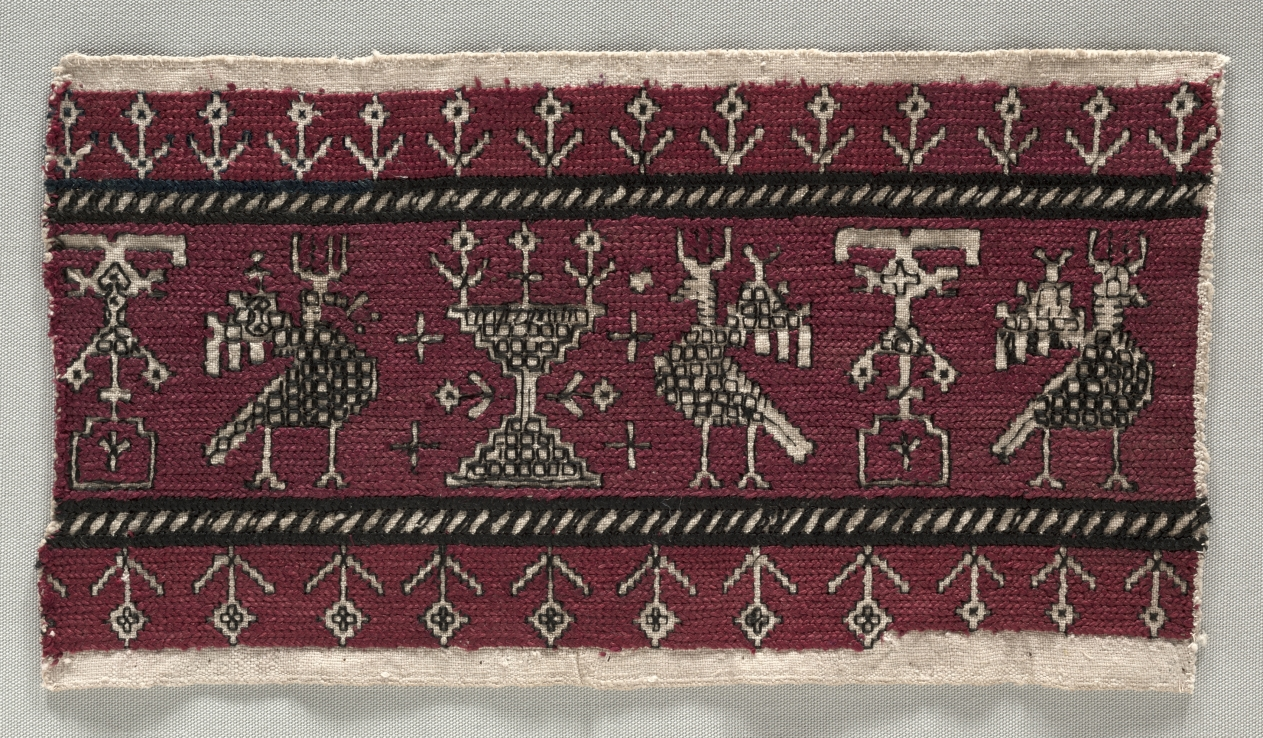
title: Fragment of a furnishing textile (one of five)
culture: Africa, North Africa, Morocco, Azemmour, Moroccan embroiderer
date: 1700s–1800s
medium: Linen, silk, dye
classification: Embroidery